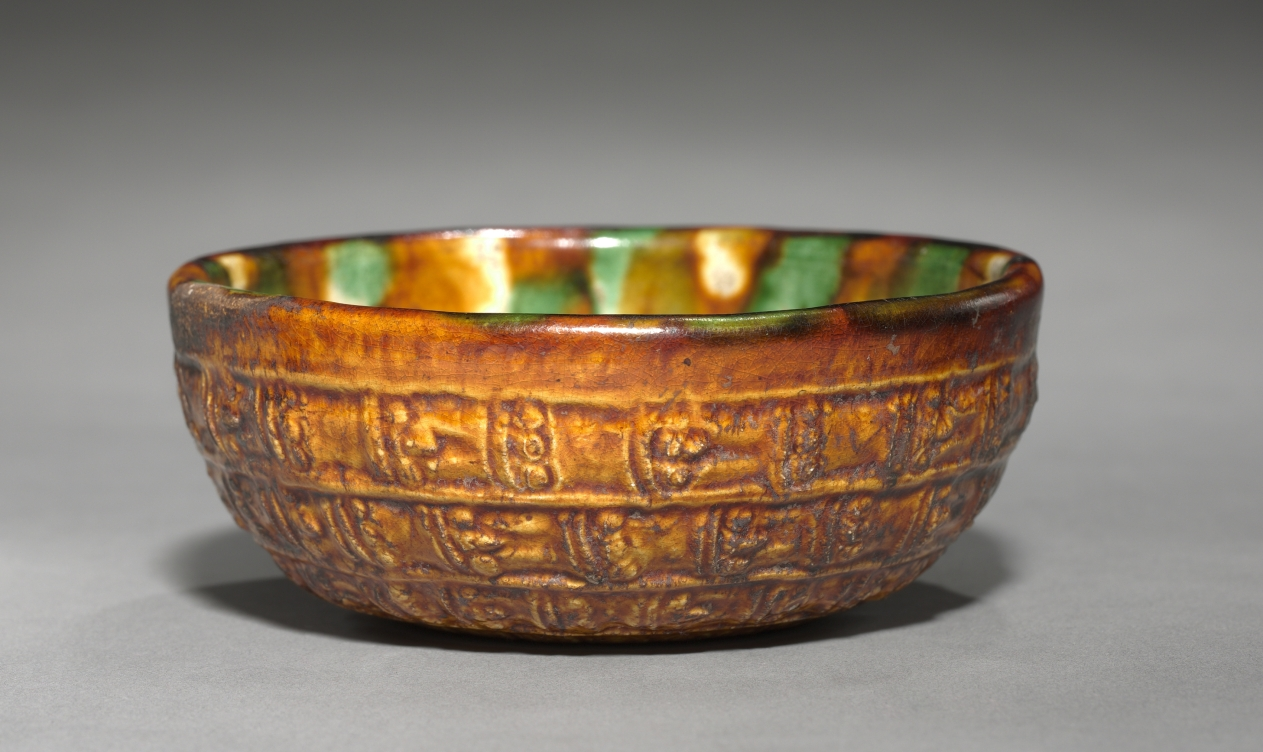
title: Bowl with Bands and Spirals in Relief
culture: China, Tang dynasty (618-907)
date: late 600s–early 800s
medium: glazed earthenware with molded decoration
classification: Ceramic